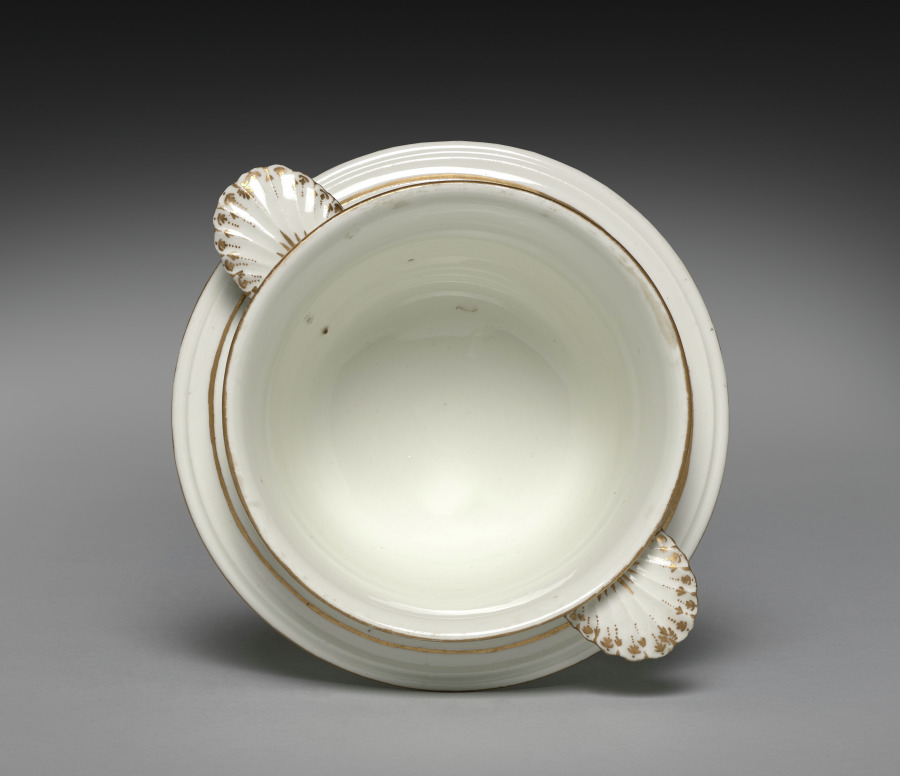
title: Food Warmer (Veilleuse) [Food Container]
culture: Germany, Nymphenburg, 18th century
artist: Meissen Porcelain Factory (German, est. c. 1710)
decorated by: probably by Georg Christoph Lindemann (German)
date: c. 1758– 1760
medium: porcelain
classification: Ceramic